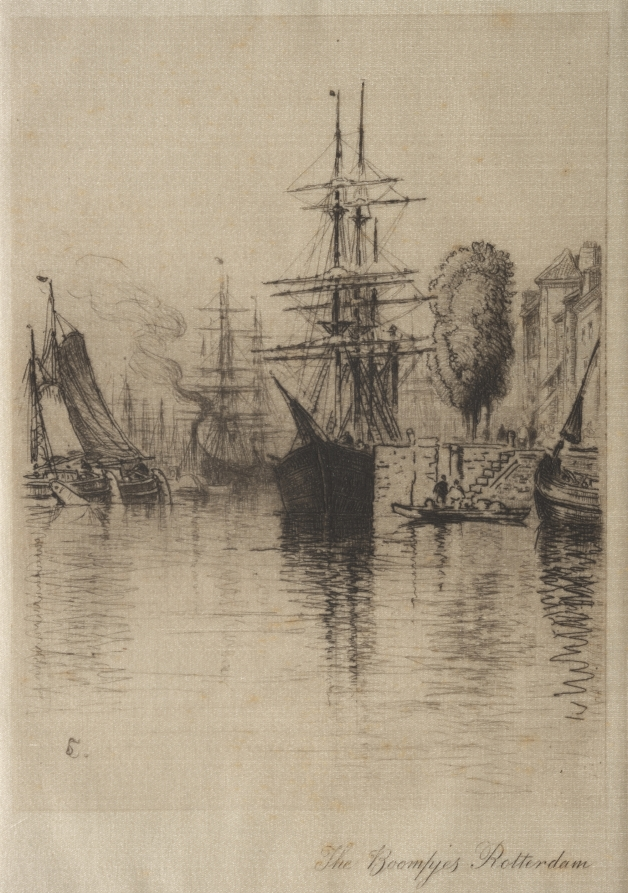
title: The Boompjes, Rotterdam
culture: America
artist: Samuel Colman (American, 1832–1920)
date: 1832–1920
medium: etching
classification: Print